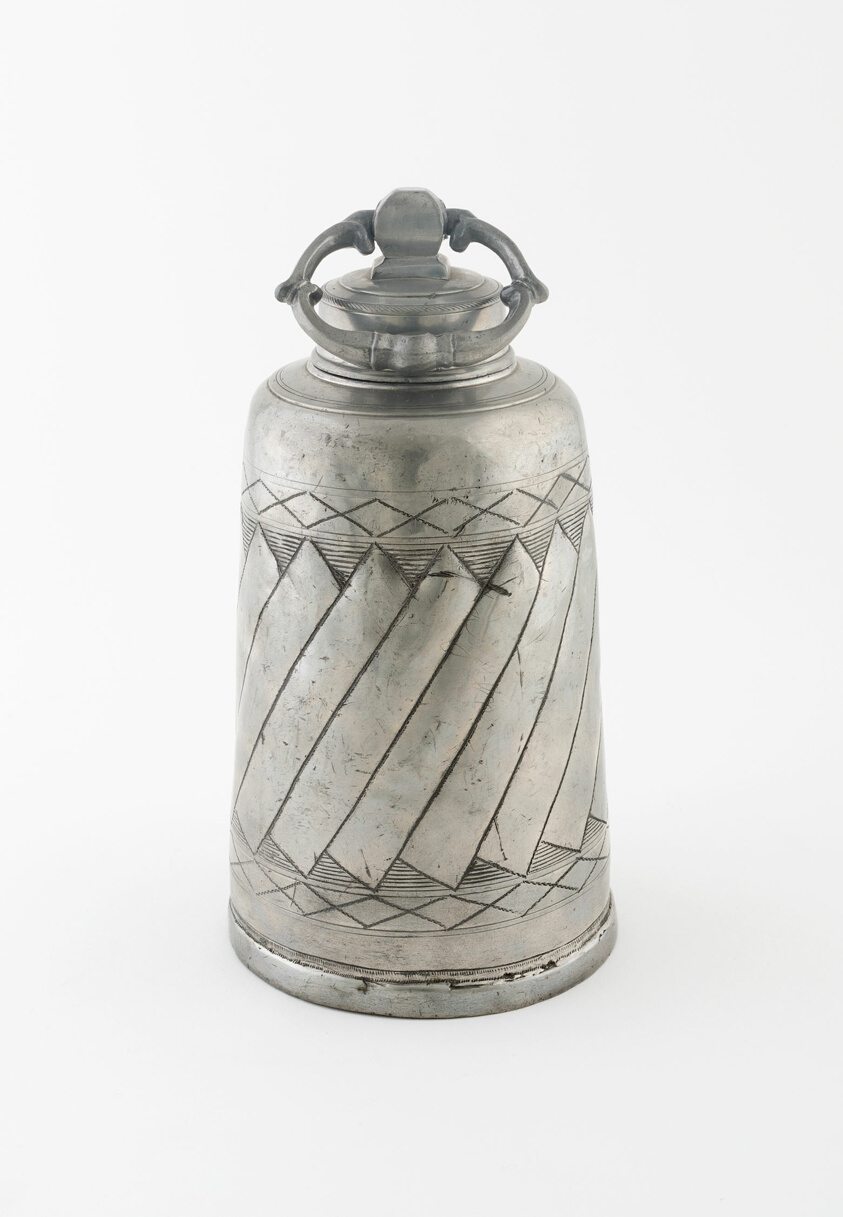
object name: Metalwork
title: Wine Cooler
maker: Probably Germany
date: c. 1800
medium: Pewter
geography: Germany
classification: pewter; metalwork; european decorative arts